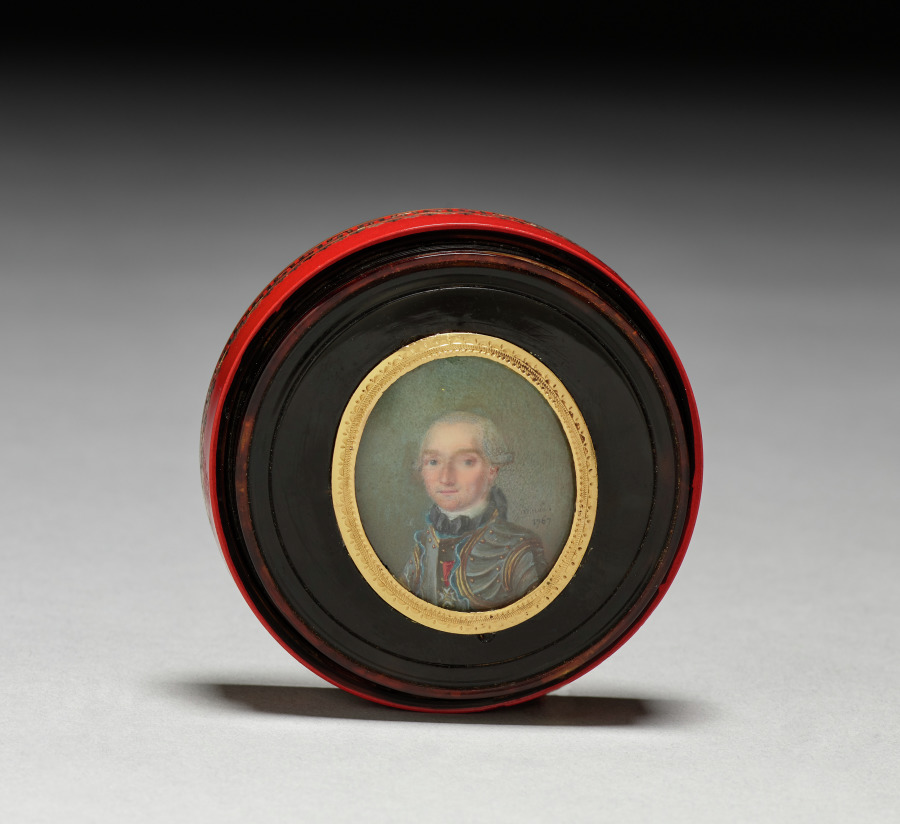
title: Round Box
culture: France, 18th century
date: c. 1760–70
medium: Tortoiseshell with red lacquer; inlays of gold, silver, and brass wire; contains a portrait miniature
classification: Miscellaneous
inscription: miniature inscribed: annee [?]/1767.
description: This small lacquer box, made in France during the 1700s, references China in that it imitates Chinese material and craftmanship such as red lacquer and celadon. This round box with an inlaid key pattern (an interlocking geometric motif ), emulates the bright vermilion color of Chinese red lacquer, typical of Suzhou lacquer ware. The key pattern is reminiscent of the so-called Chinese thunder pattern (leiwen).